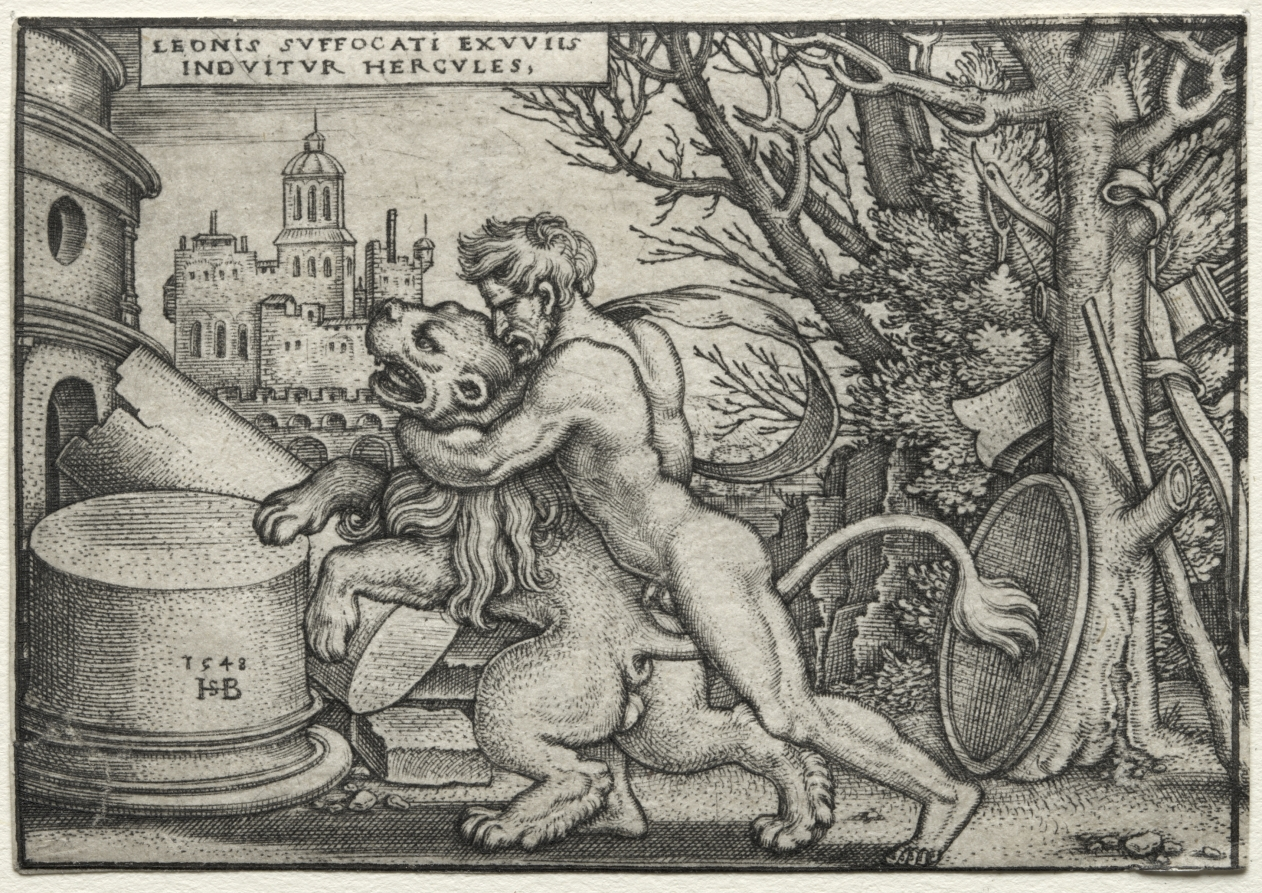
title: The Labors of Hercules: Hercules Strangling the Nemean Lion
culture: Germany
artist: Hans Sebald Beham (German, 1500–1550)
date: 1548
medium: engraving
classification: Print